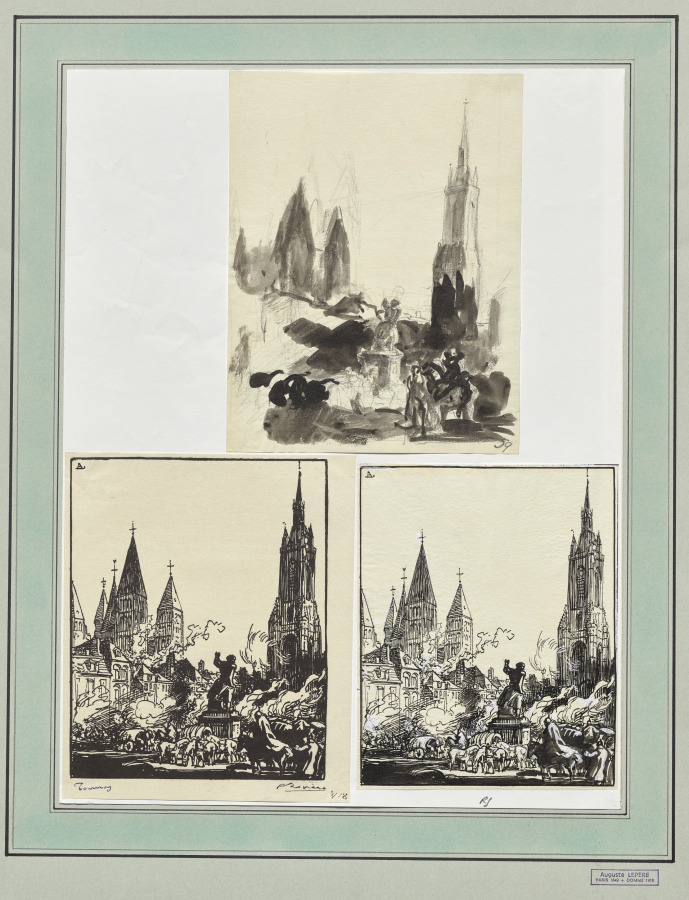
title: Tournai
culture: France, 20th century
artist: Auguste Louis Lepère (French, 1849–1918)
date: 1914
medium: brush and black ink and wash over pencil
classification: Drawing